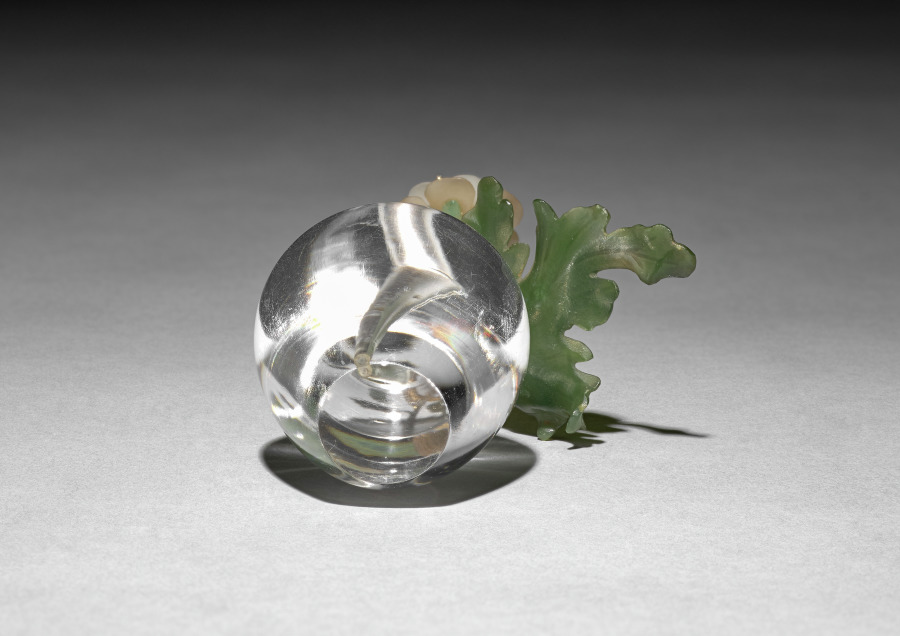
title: Flower Study of an Anemone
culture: Russia, St. Petersburg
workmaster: Henrik Wigström (Russian, 1862–1923)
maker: House of Fabergé (Russian, 1842–1918)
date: c. 1905–15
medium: mat white stone, gold, sapphires, jade, rock crystal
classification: Miscellaneous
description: This flower study depicts a wild anemone in bloom. Fabergé’s inspiration for his flower studies is said to have come from the floral brooches of precious stones that were made in the 1700s for Catherine the Great as well as from the Japanese art of flower arranging, known as ikebana. Small and delicate, Fabergé’s flower studies were given as intimate gifts to friends by the tsarina and others in the court. She also liked to take them around to wherever the imperial family was residing as a reminder of spring during the harsh Russian winters.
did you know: The stems of Fabergé’s flower studies are set into little basins carved from rock crystal to resemble pots of water.